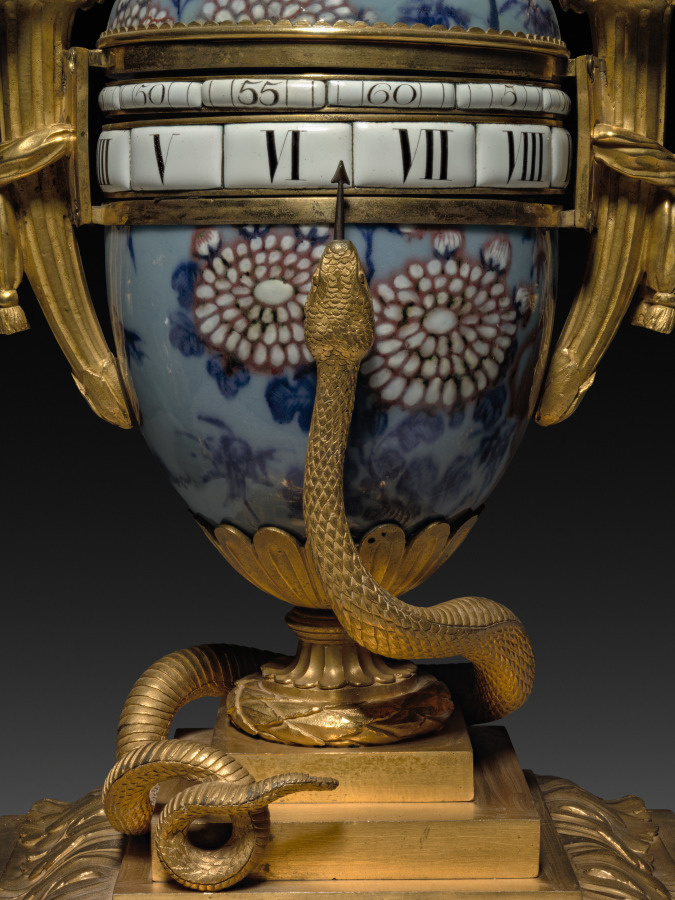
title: Garniture Set (one clock and 2 vases)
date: 1736–1770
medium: Chinese hard-paste porcelain, gilt bronze, enameled metal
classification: Furniture and woodwork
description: The fascination with Chinese porcelain among aristocratic circles increased during the reign of Louis XV. In reaction to the perceived excesses of elaborate naturalistic ornament of the 1750s, mount makers increasingly turned to neoclassical designs, known as Goût Grec (Greek taste) in the 1760s and 1770s. These beautifully chased gilt-bronze mounts feature classical Greco-Roman motifs such as lion masks, acanthus and laurel leaves, and pilasters.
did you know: A set of vases and clock, connected visually by the use of the same materials, often adorned a mantlepiece or the top of a large piece of furniture, such as a commode or console, within a room.